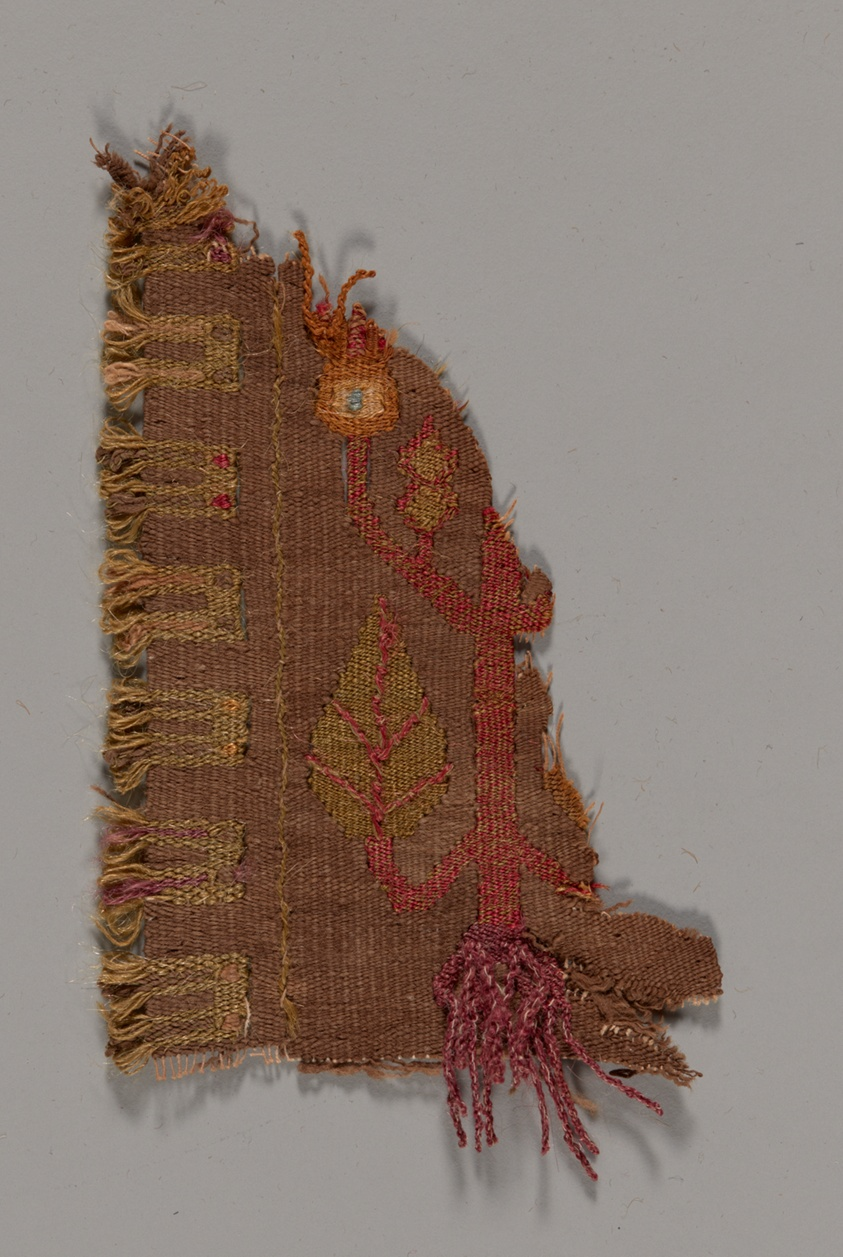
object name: Textile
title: Band Fragments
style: lambayeque, Pre-Columbian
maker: Lambayeque (North coast, Peru)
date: 1000/1476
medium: Cotton and wool (camelid), slit tapestry weave with eccentric wefts, uncut weft loop pile, extended uncut looped and plied weft fringes; embroidered with cotton and wool (camelid) with laid-in couching; and selvage weft loop fringe; three segments joined by overcast couching stitch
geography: Peru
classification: textile; weaving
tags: super/natural